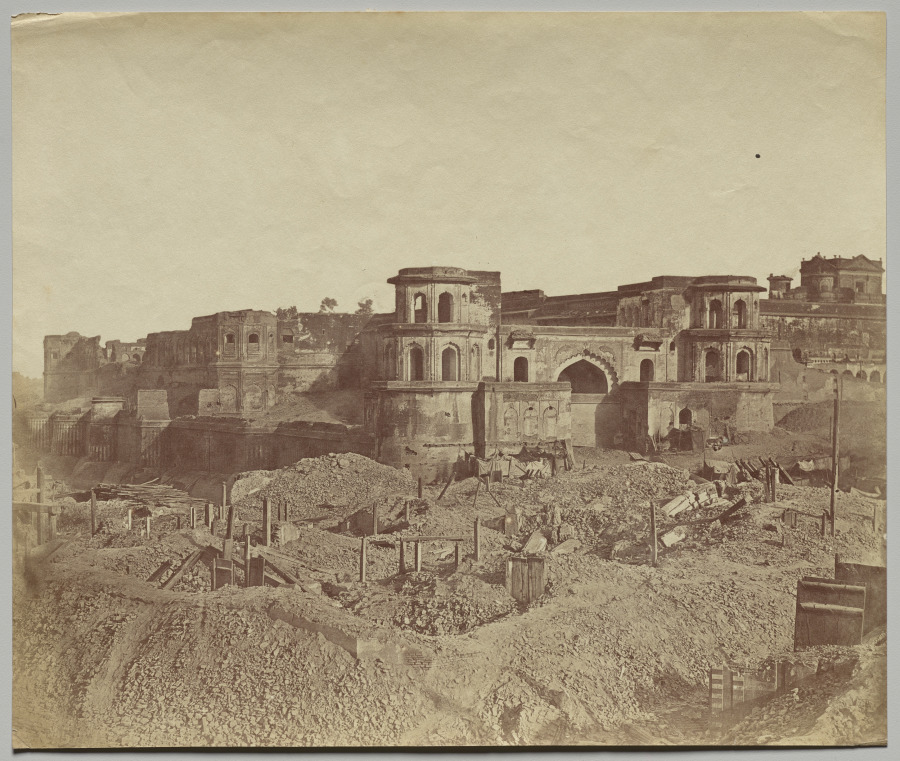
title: The Mucha Bawn, or the Old Citadel of Lucknow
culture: England, 19th century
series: Lucknow After the Siege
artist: Felice A. Beato (British, 1832–1909)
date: 1858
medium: albumen print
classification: Photograph